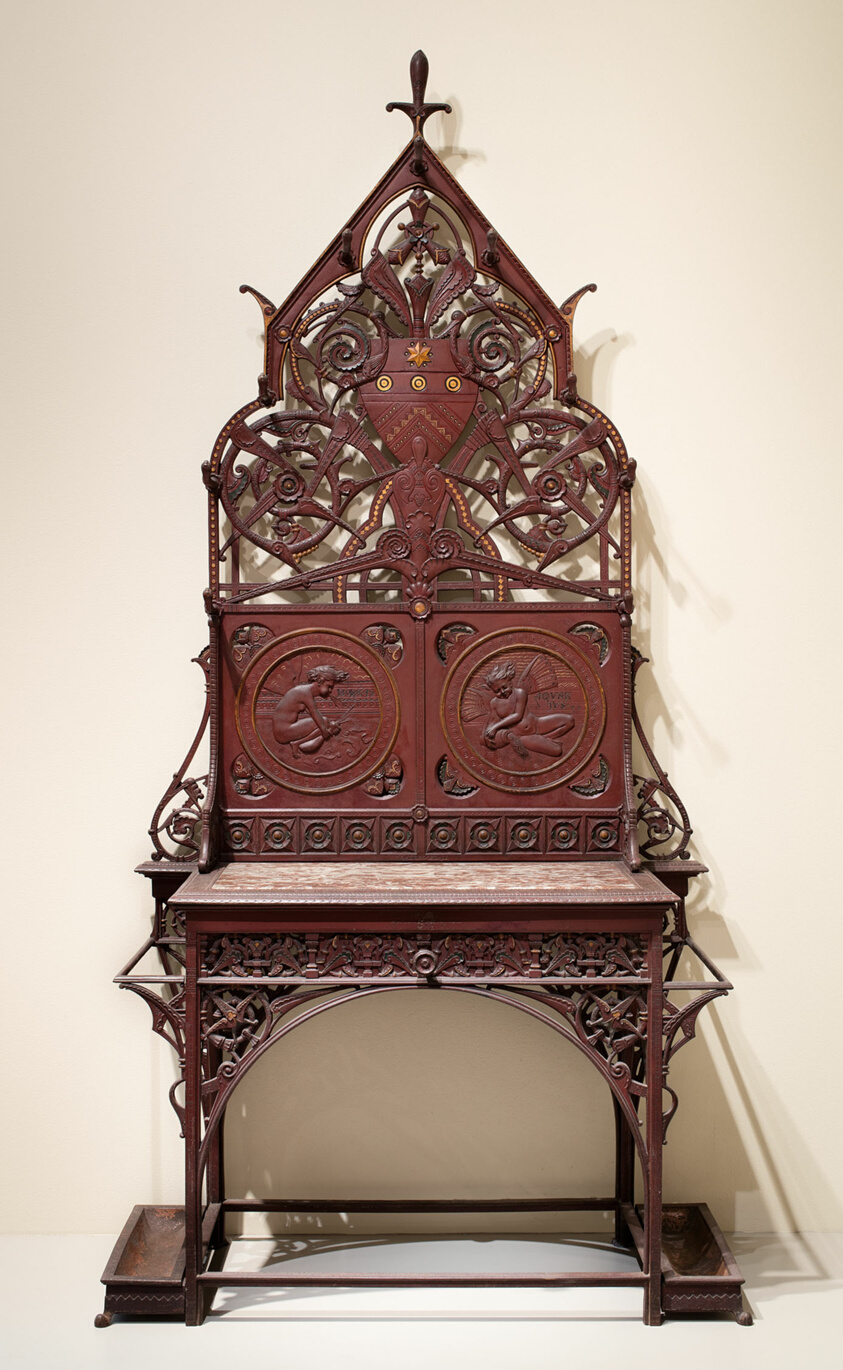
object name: Furniture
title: Hall Stand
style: gothic revival, design reform, Neoclassicism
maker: Designed by Christopher Dresser (English, born Scotland, 1834-1904); Made by Coalbrookdale Company (Shropshire, England founded c. 1756-c. 1762)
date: c. 1870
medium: Cast iron and marble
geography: Coalbrookdale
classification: ironwork; wood; european decorative arts; furniture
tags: Greek gods, furniture, rain, wind